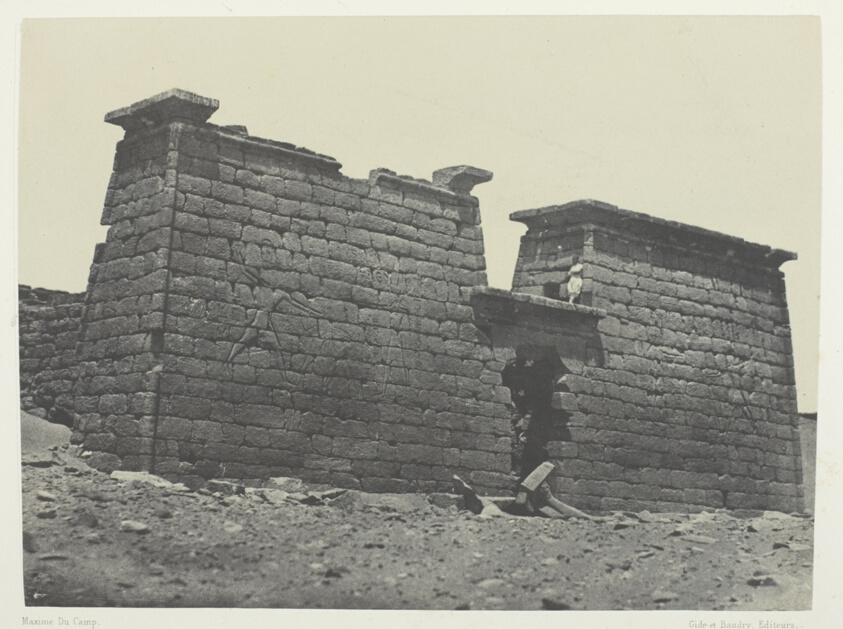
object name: Photograph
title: Hémi-Spéos De Séboua, Pylônes; Nubie, plate 98 from the album "Egypte, Nubie, Palestine et Syrie" (1852)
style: 19th century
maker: Maxime Du Camp (French, 1822–1894)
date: 1849/51, printed 1852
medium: Salted paper print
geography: France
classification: salted paper print; photographic process; photography; photograph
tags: Collected by Hugh Edwards, Egypte, Nubie, Palestine et Syrie